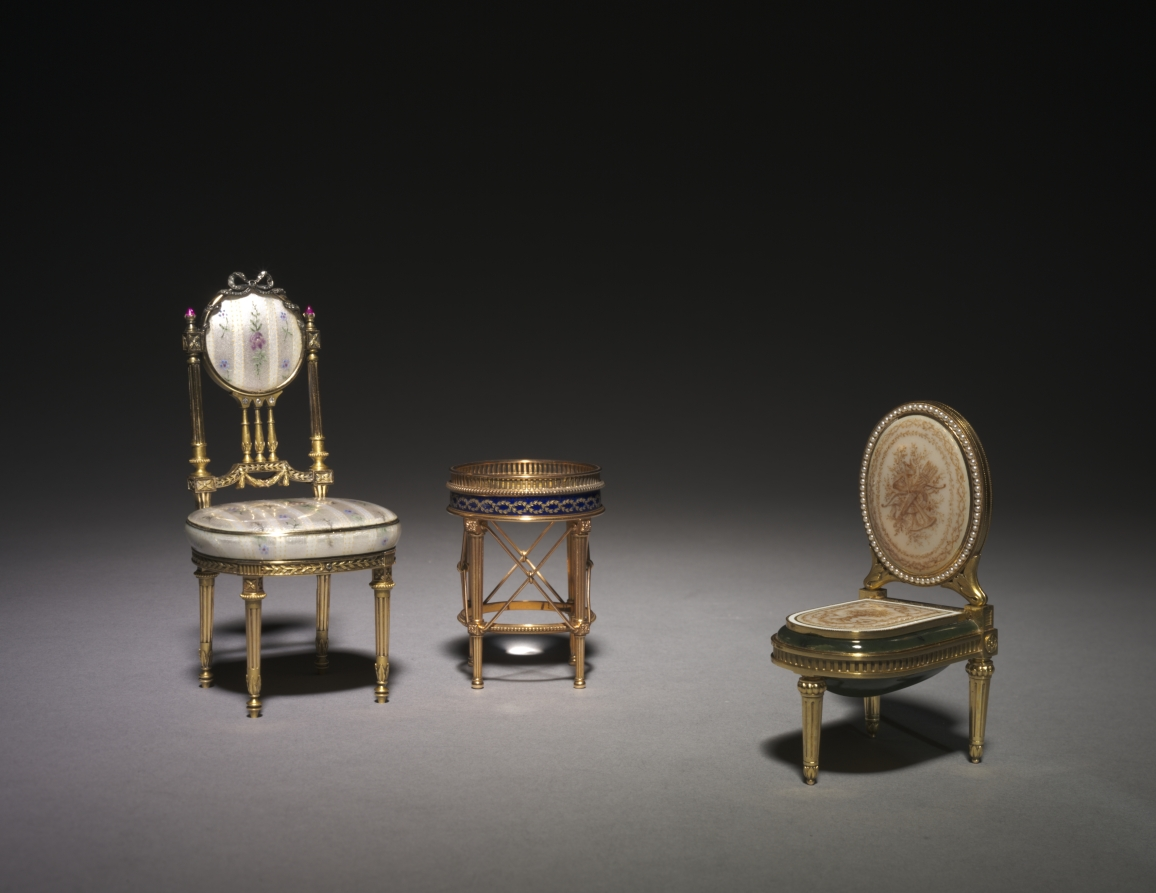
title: Miniature Chair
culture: Russia, St. Petersburg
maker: House of Fabergé (Russian, 1842–1918)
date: 1896–1906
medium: gold, silver gilt, enamel, rubies, diamonds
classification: Miscellaneous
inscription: 56, Kokoshnik; tester's initials in Cyrillic; 84, Kokoshnik, tester's initials in Cyrillic; К.ФАБЕРЖЕ [C. Fabergé]; Kokoshnik; double-headed eagle; К.Ф. [C.F.]; 25196 scratched.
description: The giving of small precious objects as intimate gifts between family members within the imperial court was spurred by the House of Fabergé's seemingly endless supply of bejeweled utilitarian objects decorated as expensively as possible, such as this stamp holder disguised as an exquisite miniature chair in the Louis XVI taste of the late 1700s.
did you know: This miniature chair has a clever mechanism that allows the seat cushion to slide forward and upward slightly so that it can be opened to reveal a compartment, probably used to hold stamps on a desk.